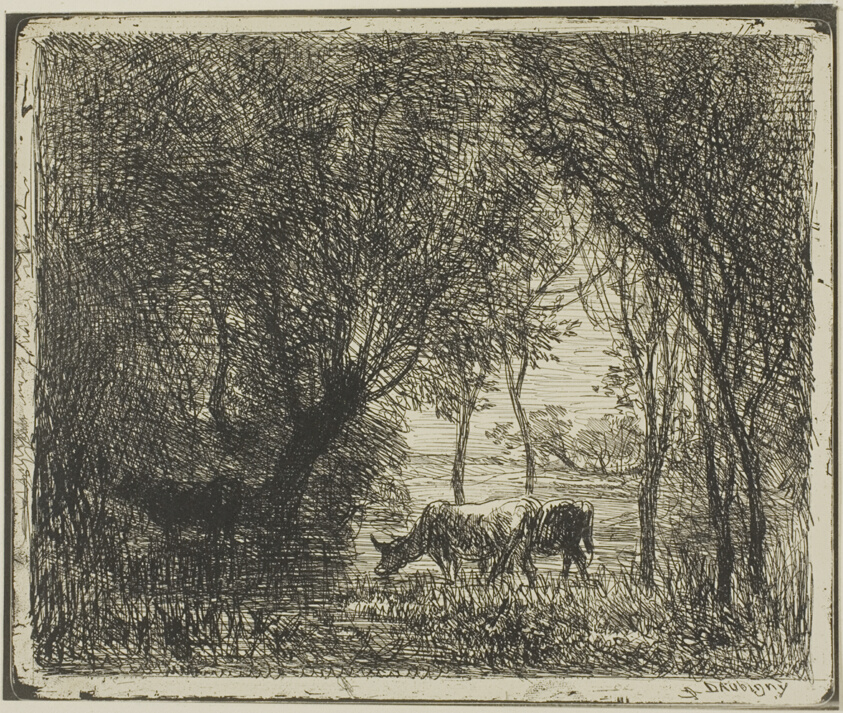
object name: Print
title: Cows in a Wood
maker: Charles François Daubigny (French, 1817-1878)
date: 1862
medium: Cliché-verre on ivory photographic paper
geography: France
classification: cliché-verre; print; prints and drawing